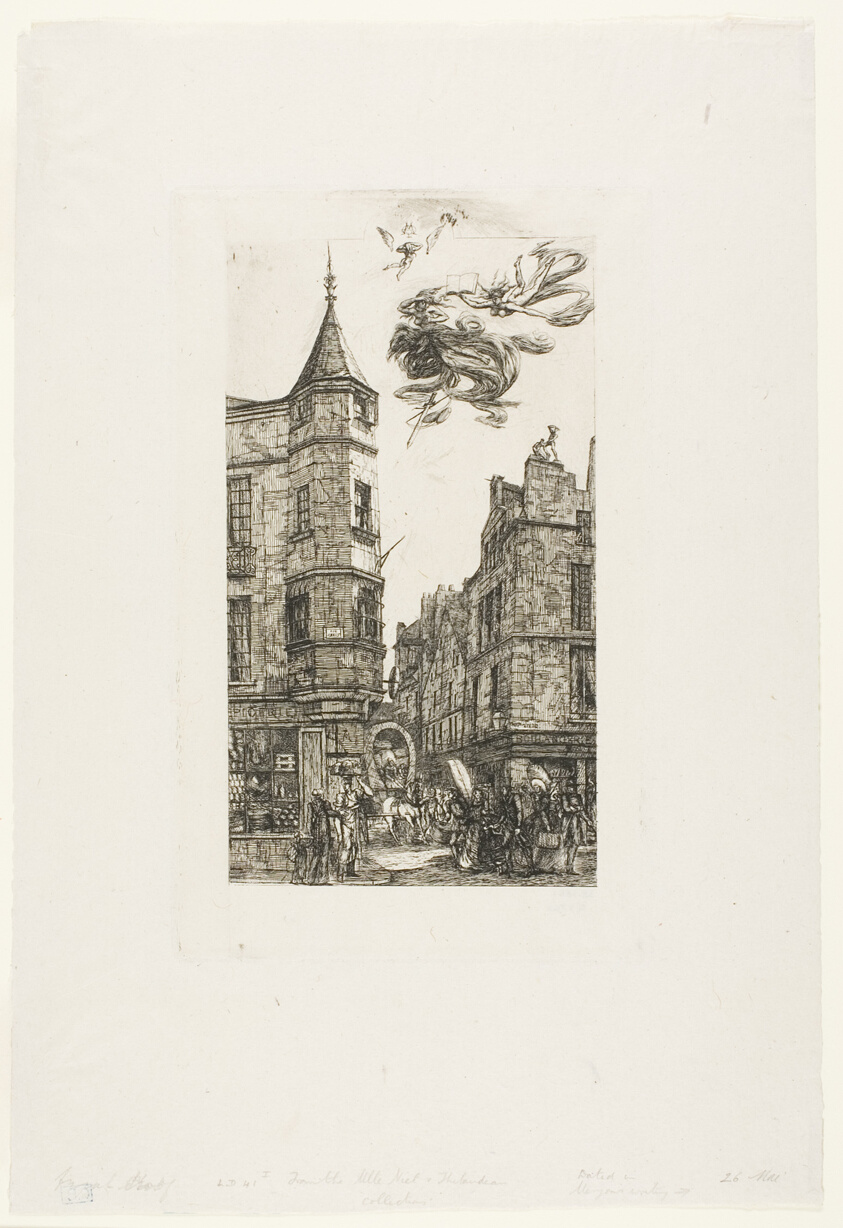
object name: Print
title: House with a Turret, No 22, rue de l'Ecole de Médecine, Paris (called the Turret of Marat)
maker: Charles Meryon (French, 1821-1868)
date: 1861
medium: Etching on ivory laid paper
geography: France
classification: etching; print; prints and drawing